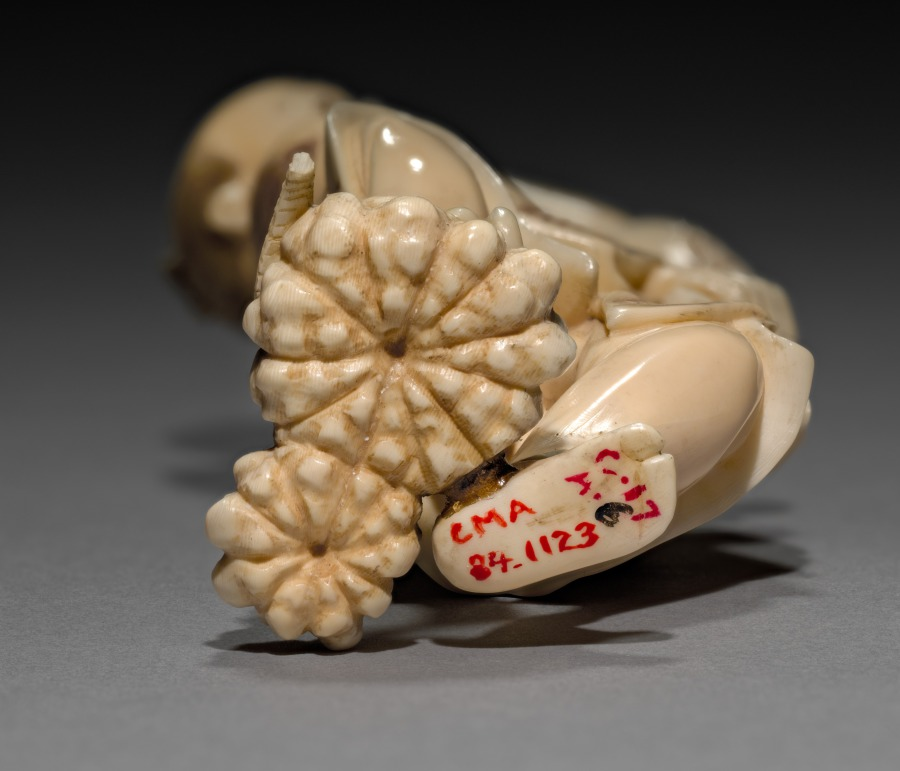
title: Man and Serpent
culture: Japan, Meiji period (1868–1912)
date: early 1900s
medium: ivory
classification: Ivory